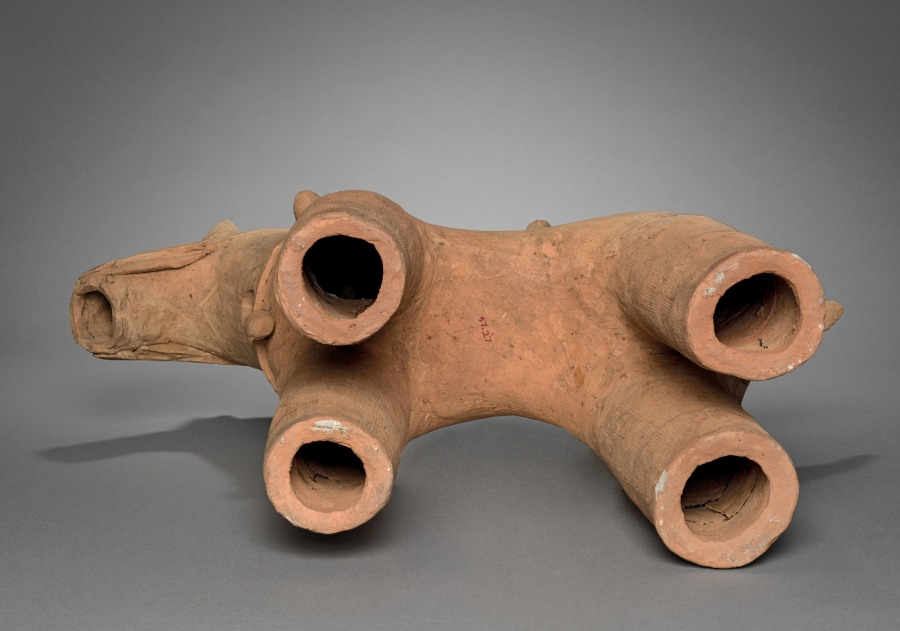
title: Haniwa Horse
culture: Japan, Kofun period (300–710 CE)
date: 400s–500s CE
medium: earthenware with traces of pigment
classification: Sculpture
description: This horse’s tack, with its round bells, resembles saddlery in fashion in Korea during the 400s–500s CE. Concurrent with mass migration from the Korean Peninsula, tombs covered with large earthen mounds similar to those on the Asian continent began to appear in Japan around the year 300 CE. Called “old mounds” (kofun), their surfaces were covered with hollow clay cylinders (haniwa). Sculptures of animals, buildings, and finally human figures followed, developing over the ensuing three centuries.